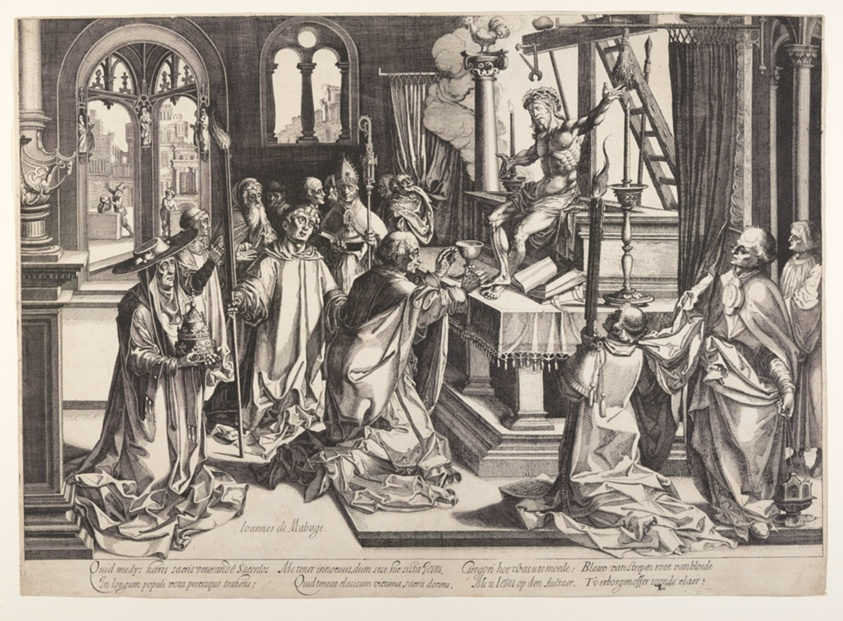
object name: Print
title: The Mass of Saint Gregory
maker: Simon Frisius (Dutch, c. 1580–1629); after Jan Gossaert (Flemish, 1478–1532)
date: c. 1615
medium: Etching on ivory laid paper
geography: Netherlands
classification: print; paper; prints and drawing; etching